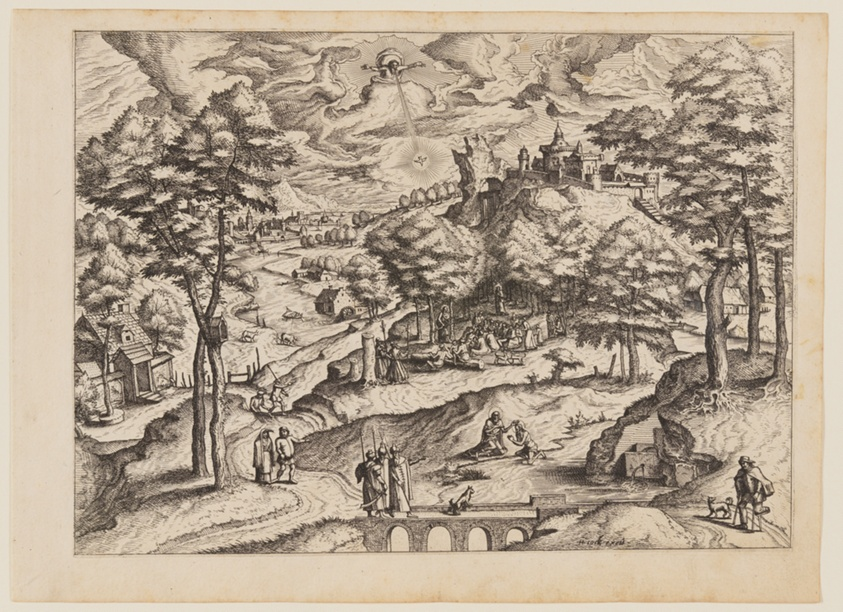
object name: Print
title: The Baptism of Christ, from Landscapes with Biblical Subjects and Saints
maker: Johannes van Doetecum (Netherlandish, 1528/32–1605) and Lucas van Doetecum (Dutch, died before 1584); after Lucas Gassel (Netherlandish, c. 1485-c. 1568)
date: c. 1562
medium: Etching on ivory laid paper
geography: Netherlands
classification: etching; paper; print; prints and drawing